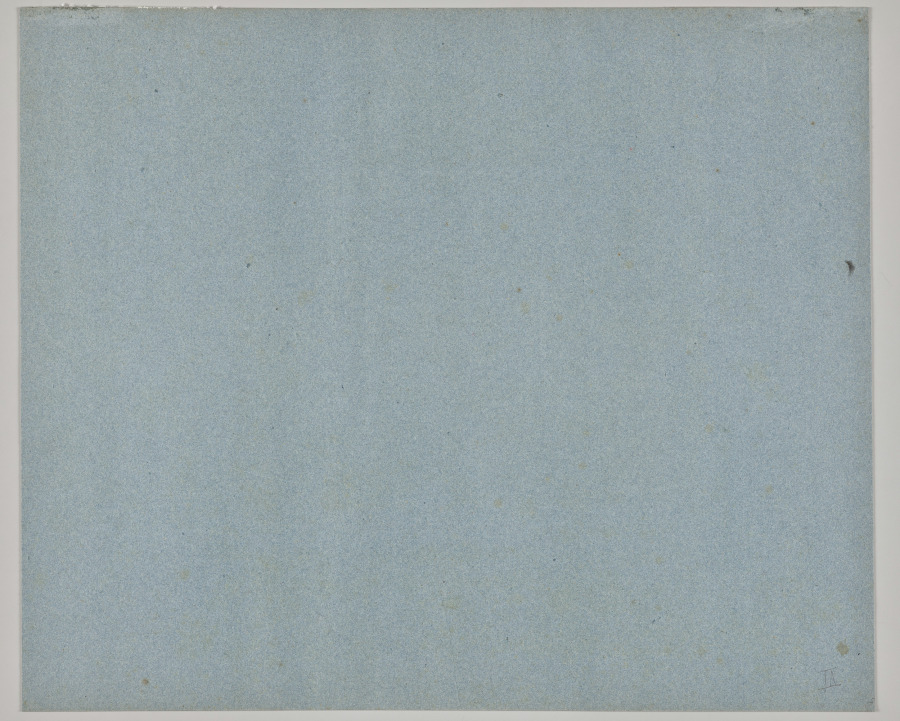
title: Friday. Meadow Plan in Front of Aigen Near Salzburg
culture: Germany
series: Seven Areas from Salzburg and Berchtesgaden. Arranged according to the seven days of the week, connected by two allegorical sheets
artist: Ferdinand Olivier (German, 1785–1841)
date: 1818–23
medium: lithograph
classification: Print